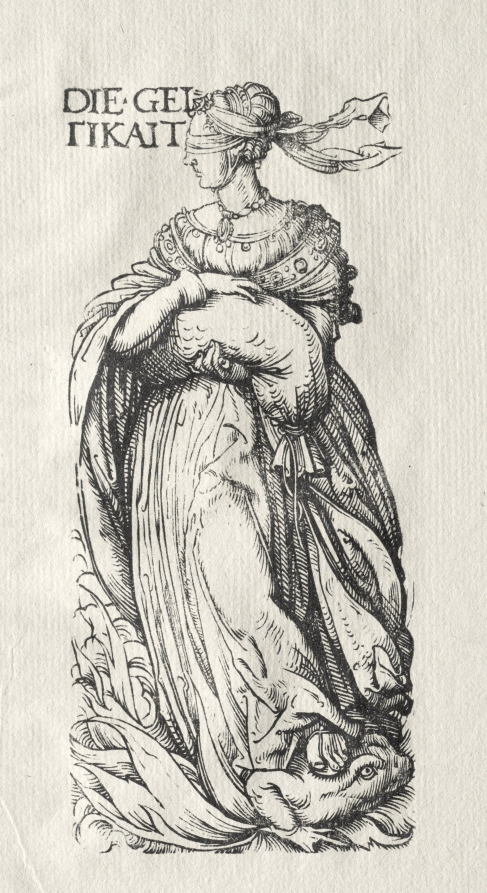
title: The Seven Vices: Avarice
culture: Germany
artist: Hans Burgkmair (German, 1473–1531)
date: c. 1510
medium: woodcut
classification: Print